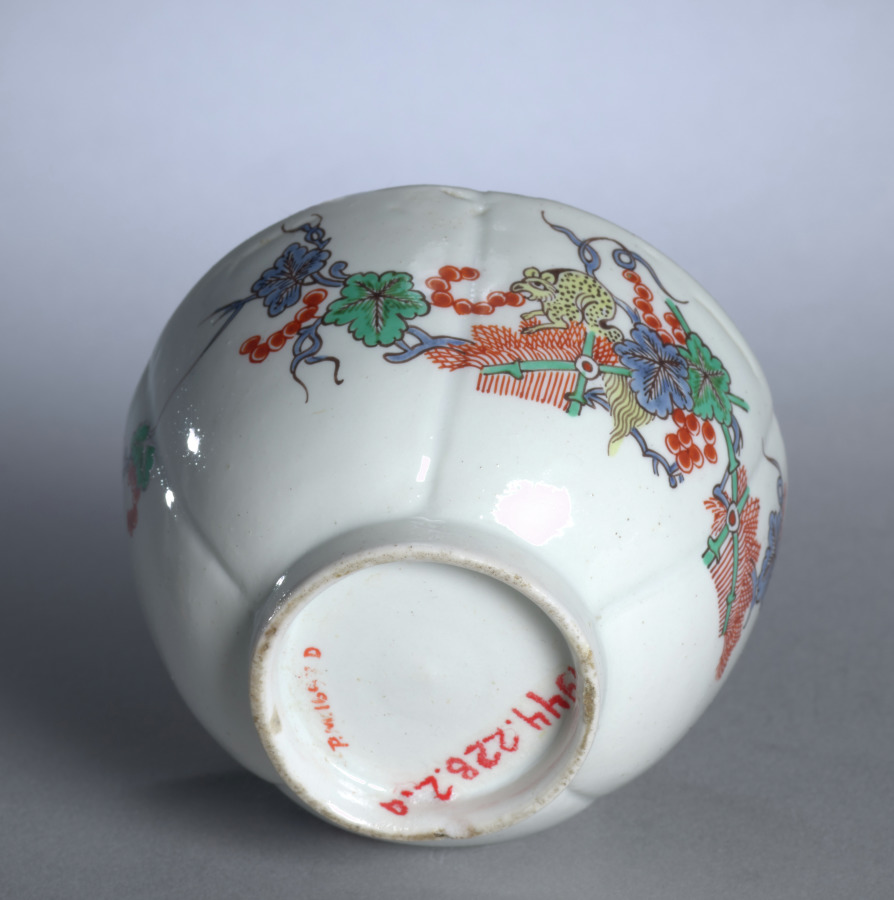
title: Sugar Bowl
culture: France, Chantilly, 18th century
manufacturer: Chantilly Porcelain Factory (French)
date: c. 1730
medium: soft-paste porcelain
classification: Ceramic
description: The pieces composing this individual tea set are entirely typical of Chantilly soft-paste porcelain in the Kakiemon style. Both the form and decoration of these pieces were inspired by Japanese prototypes. The use of knobs in the form of trumpet-shaped blossoms is characteristic of Chantilly wares.